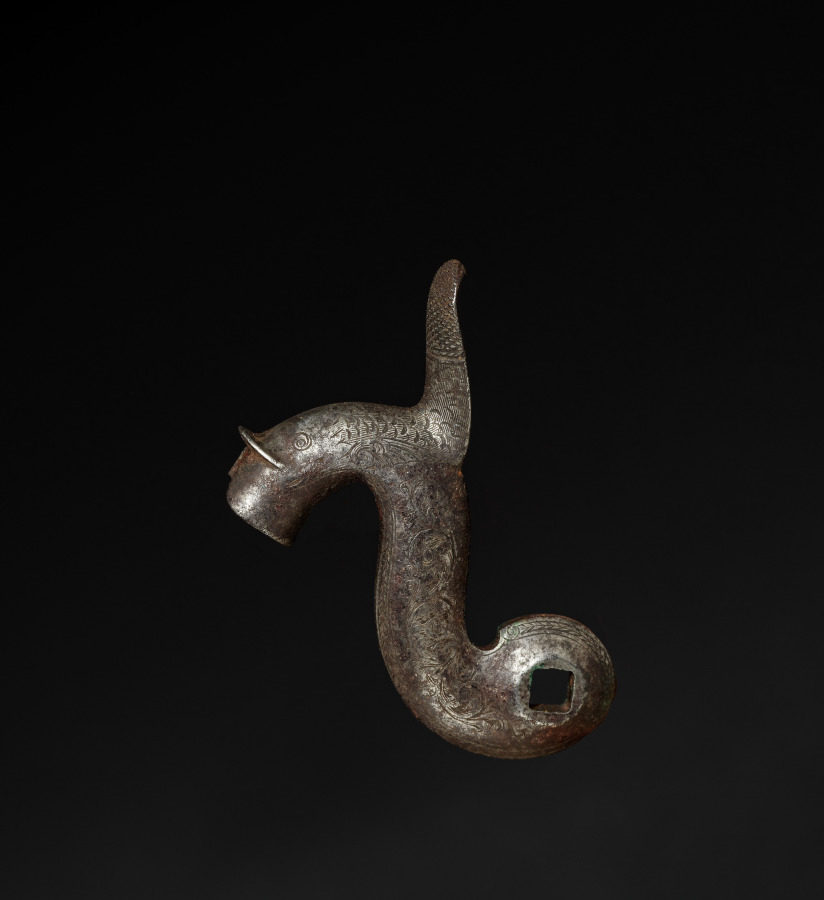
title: Gun-Lock Hammer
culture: England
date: c. 1800–1825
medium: steel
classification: Arms and Armor